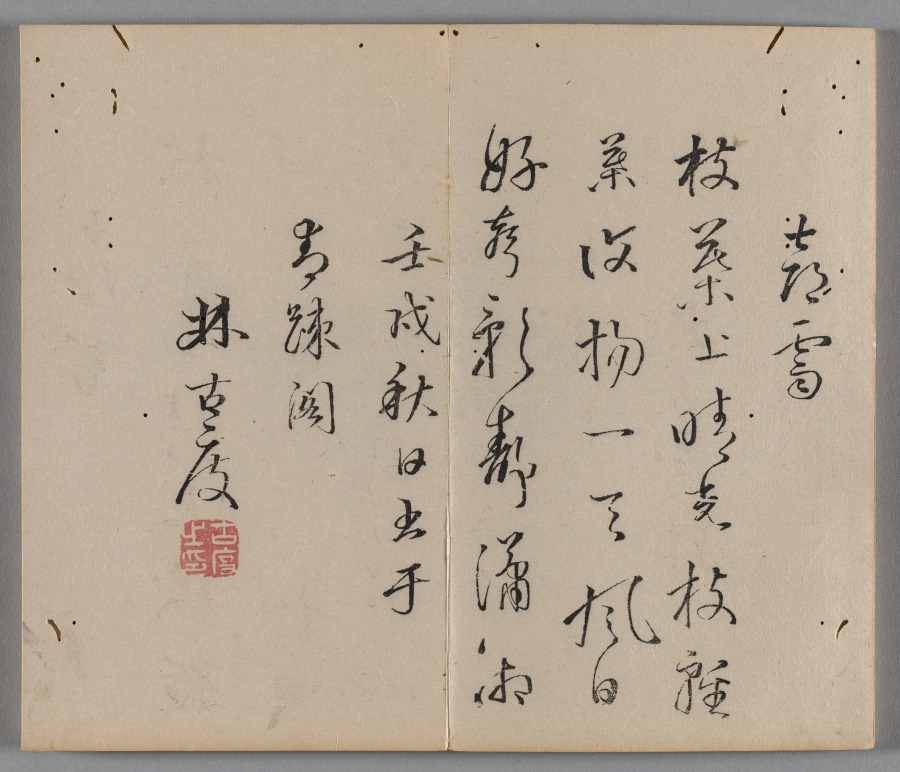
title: Ten Bamboo Studio Painting and Calligraphy Handbook (Shizhuzhai shuhua pu): Bamboo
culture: China, Qing dynasty (1644-1911)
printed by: Hu Zhengyan (Chinese, c. 1584–1674)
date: 1633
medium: Woodblock-printed book; ink and colors on paper; first edition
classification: Print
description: Color printing reached a level of perfection in the early 1600s, as seen in this Ten Bamboo Studio Collection of Calligraphy and Painting and the Mustard Seed Garden Manual of Painting (printed 1679 and 1701). The painterly quality, precision in registering (aligning) the woodblocks, and harmonious colors made them the most successful color print editions in Chinese history. Both editions were printed and compiled in Nanjing, spread nationwide, and had a great impact on the arts in Japan and Korea.